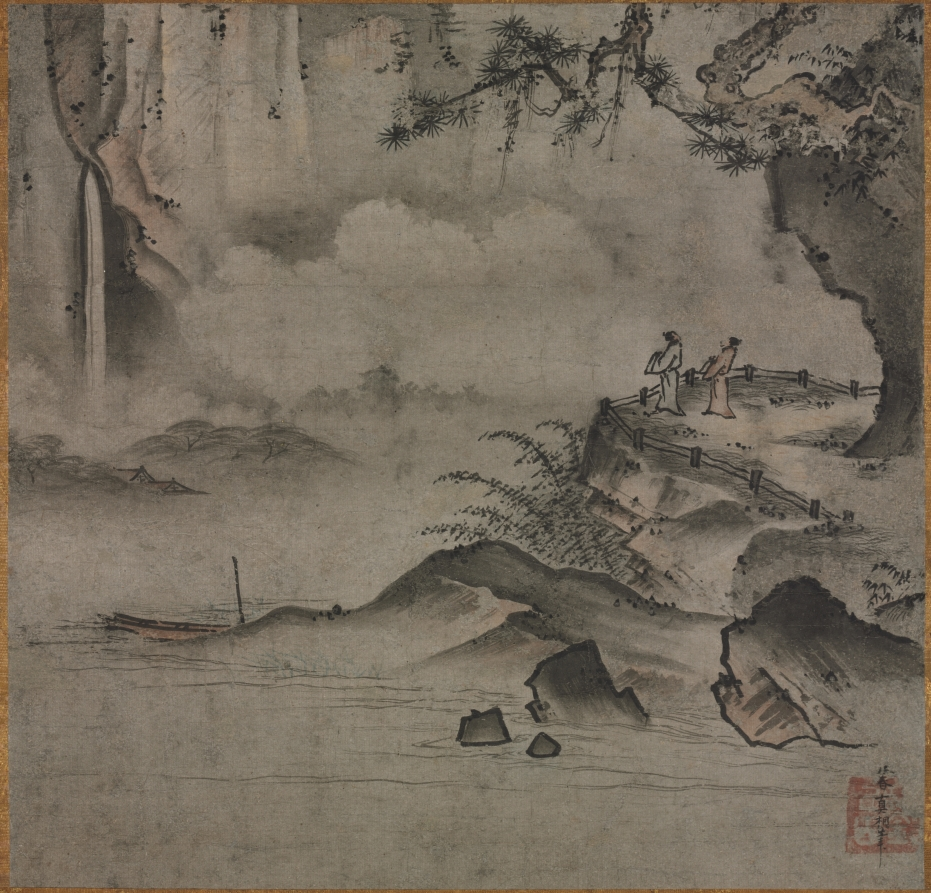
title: Gazing at a Waterfall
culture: Japan, Muromachi period (1392–1573)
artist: Sōami (Japanese, d. 1525)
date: early 1500s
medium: Album leaf mounted as a hanging scroll; ink and slight color on paper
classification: Painting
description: Chinese poet Li Bai’s (701–762) poem “Gazing at a Waterfall on Mount Lu” is about experiencing the vastness of the galaxy in relationship to one’s own being. Japanese Zen monk-poet Keijo Shūrin (1440–1518) identified Li’s poem as the inspiration for Japanese painter Geiami’s (1431–1485) work Gazing at a Waterfall, in the collection of the Nezu Museum, which features sharp brushstrokes and bright colors. In contrast, this album leaf’s painter, Geiami’s son Sōami, took a more delicate approach to the theme. The waterfall and the pair watching it frame the mist rising from the water at the center of the image.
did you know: The setting of this painting is historical China, as evidenced by the clothing and hairstyles of the two people appreciating the waterfall.